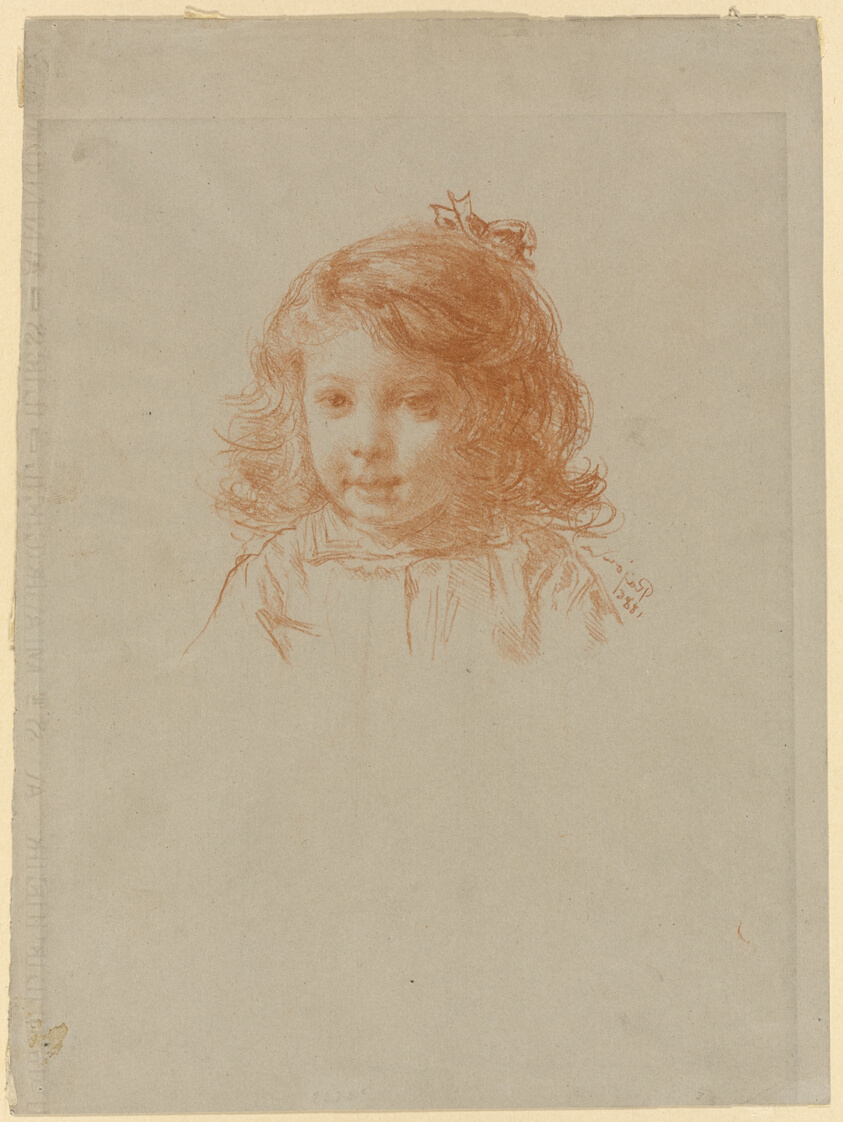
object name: Drawing and Watercolor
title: Bust of a Young Girl (recto); Profile of a Young Girl (verso)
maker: Paul Adolphe Rajon (French, 1843-1888)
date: 1886 (recto); c. 1886 (verso)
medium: Red chalk transfer (recto), and red chalk (verso), on gray wove paper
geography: France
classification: chalk; drawings (visual works); prints and drawing